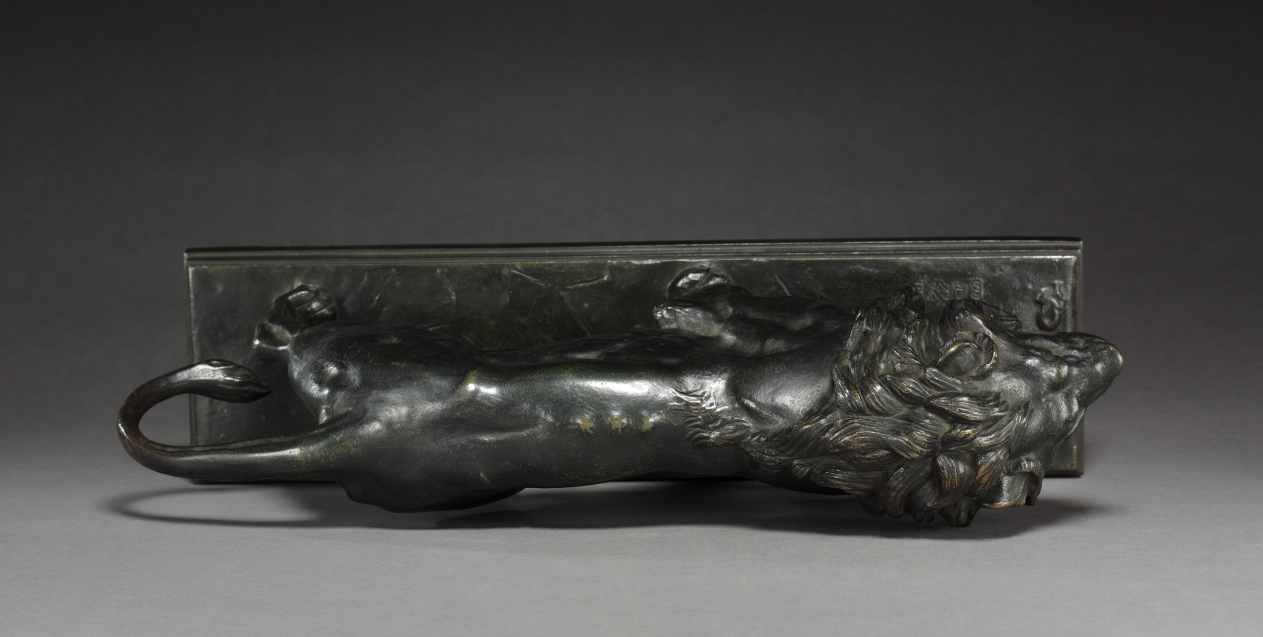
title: Walking Lion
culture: France, 19th century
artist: Antoine-Louis Barye (French, 1796–1875)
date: after 1836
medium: bronze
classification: Sculpture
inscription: Written on base: "Barye"